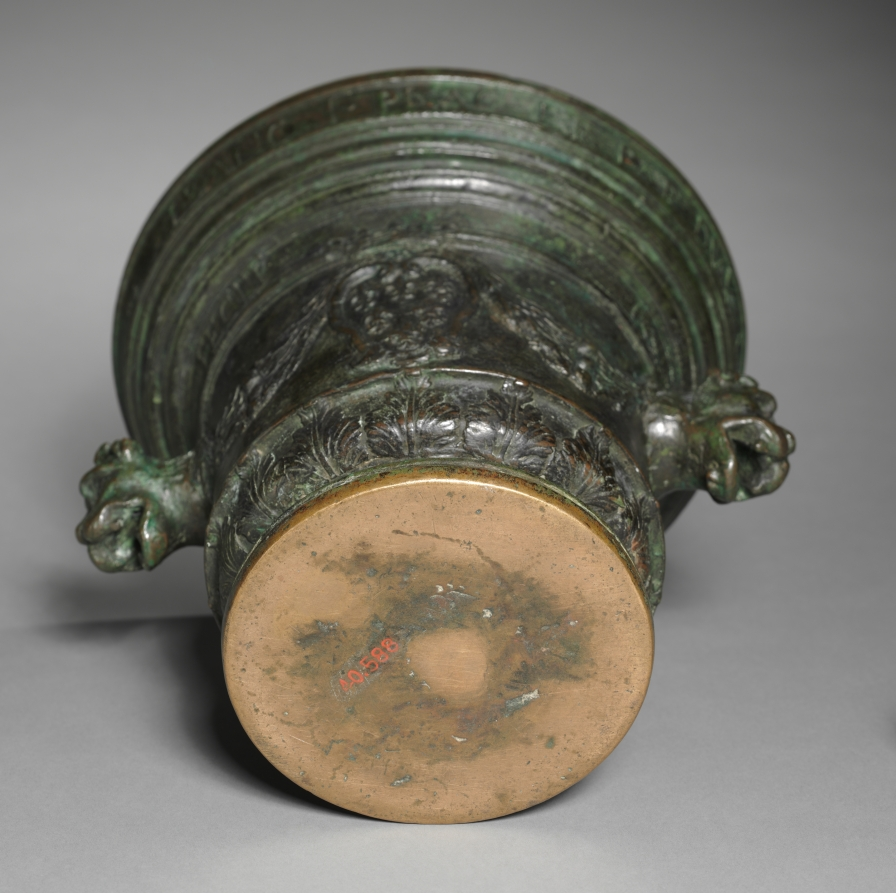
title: Mortar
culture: Italy, 18th century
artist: Georgius Mazzochus (Italian)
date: 1712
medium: bronze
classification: Sculpture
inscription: Inscription on obverse: "ANNO M D C C XII / GEORGIUS MAZZOCHUS / (fleur-de-lis)" Insciption on reverse: "FRANC I . PLAC ET PAR DUX VII / FECIT / (crowned shield with 6 fleur-de-lis)"